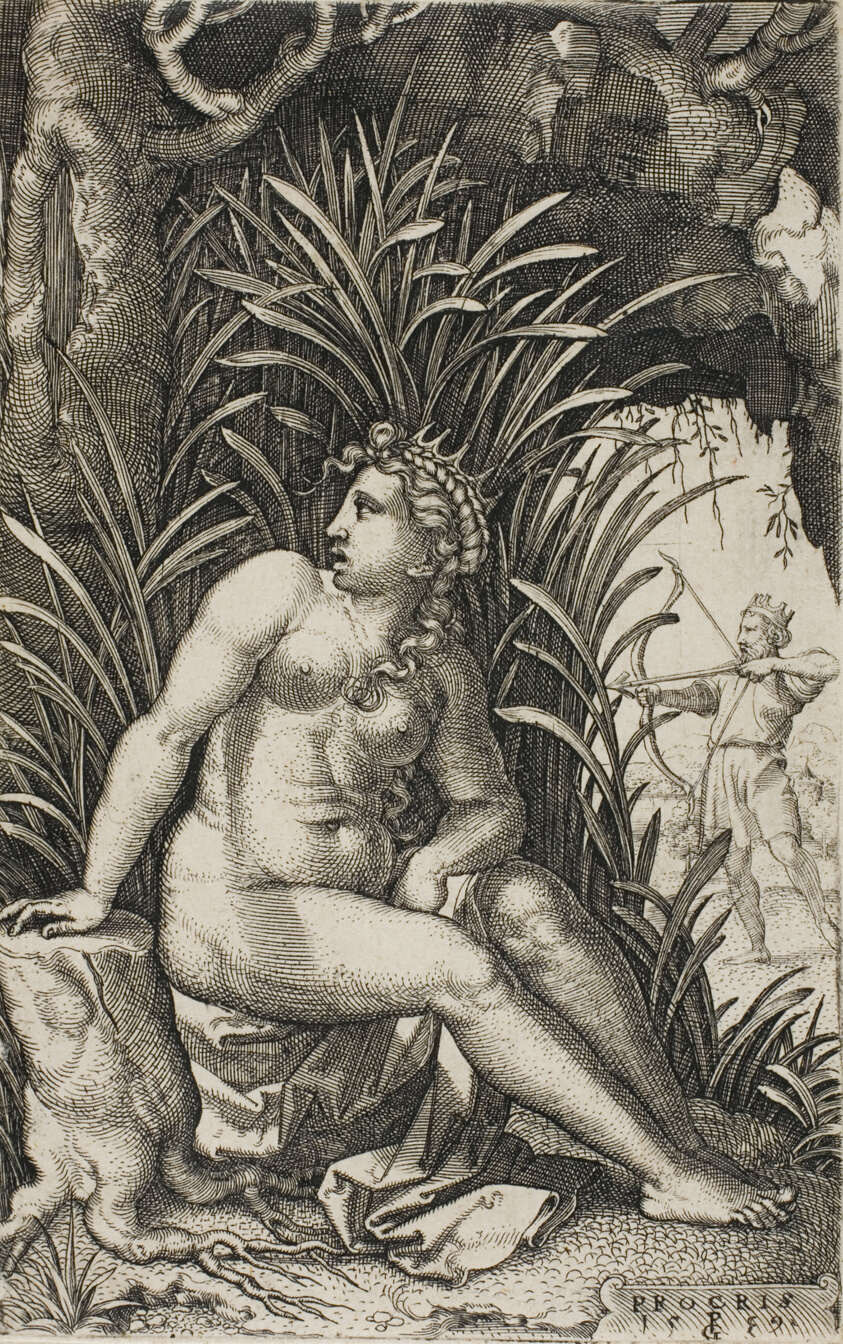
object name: Print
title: Procris, from Greek Heroines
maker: Georg Pencz (German, c. 1500-1550)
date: 1539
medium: Engraving in black on ivory laid paper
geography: Germany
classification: engraving; print; prints and drawing